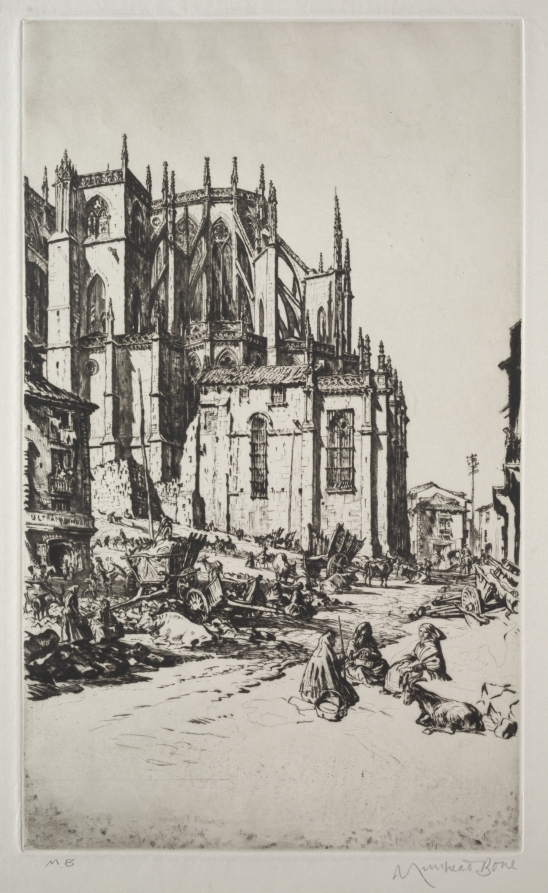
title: Study for Leon Apse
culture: England, 20th century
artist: Muirhead Bone (British, 1876–1953)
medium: drypoint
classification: Print